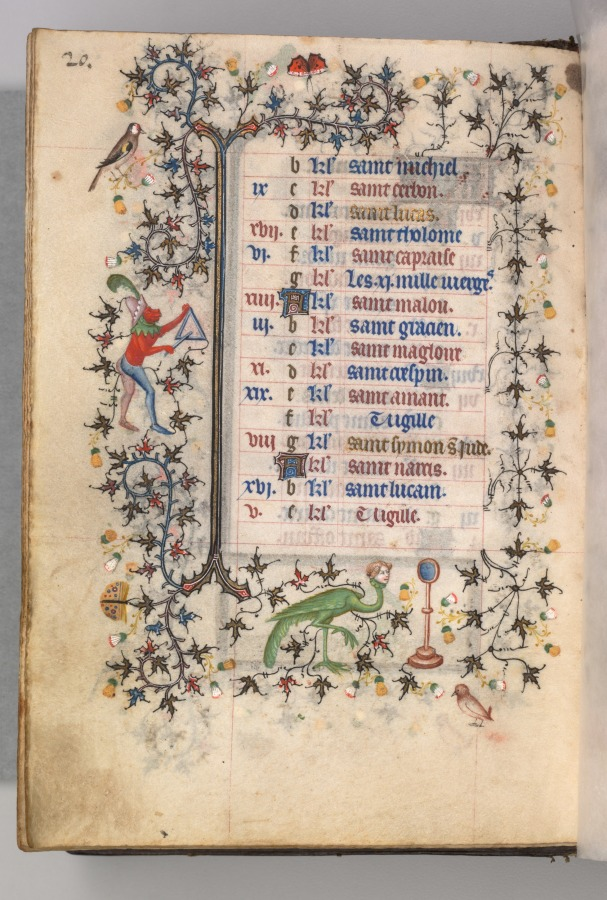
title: Hours of Charles the Noble, King of Navarre (1361-1425): fol. 10v, October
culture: France, Paris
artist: Master of the Brussels Initials and Associates (French)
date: c. 1405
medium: ink, tempera, and gold on vellum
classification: Bound Volume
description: This precious book was highly prized by its owner, Charles III, King of Navarre, a French-born prince whose coat of arms is painted on 20 folios. Charles visited Paris on numerous occasions and likely acquired this volume there in 1404. Paris was the center of the European book trade at the time and attracted illuminators from many parts of Europe. This manuscript represents one of the most remarkable fusions of French and Italian taste in book illumination. Though conforming to Parisian standards, most of the book’s major miniatures are the work of the Brussels Initials Master, an Italian illuminator who previously worked in Bologna and Padua.